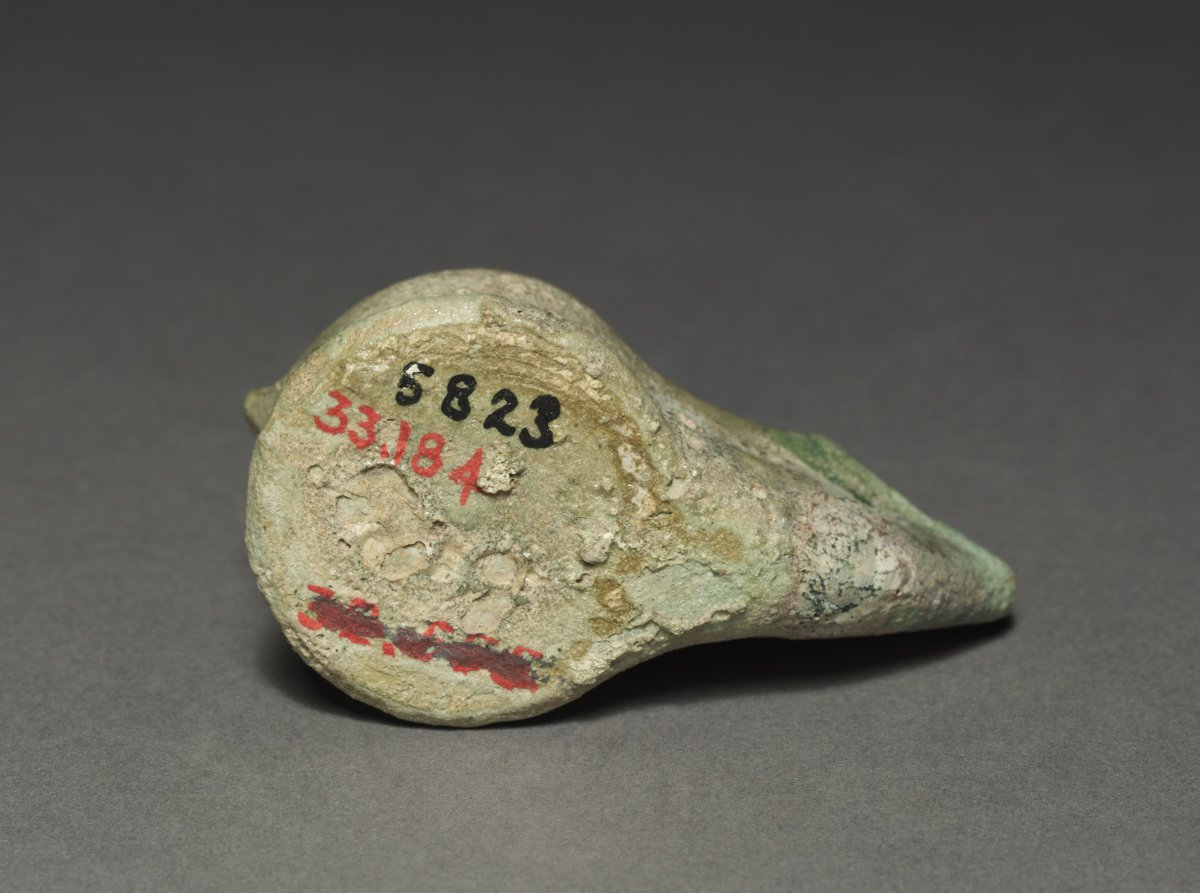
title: Lamp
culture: Parthian Empire (247 BCE–224 CE)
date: 1–200 CE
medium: terracotta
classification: Ceramic